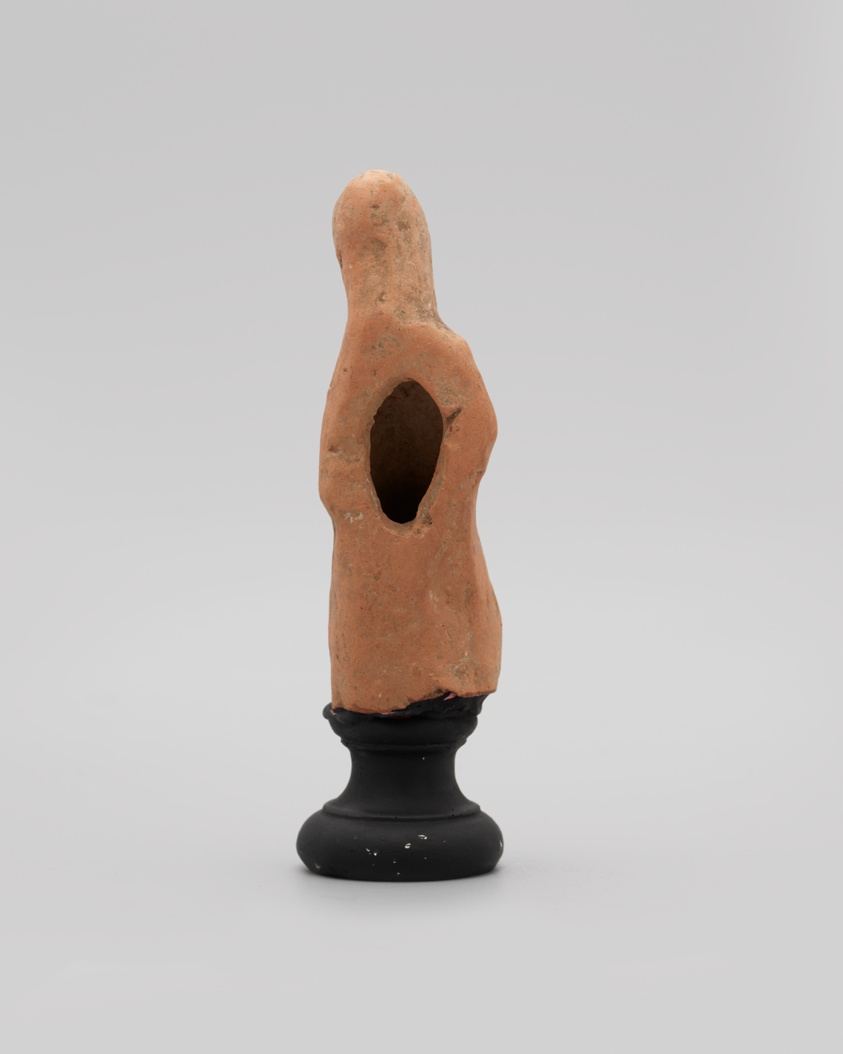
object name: Sculpture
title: Statuette of a Woman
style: greek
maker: Greek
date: 5th-4th century BCE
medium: terracotta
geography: Smyrna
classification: earthenware; ceramics; sculpture; ancient art